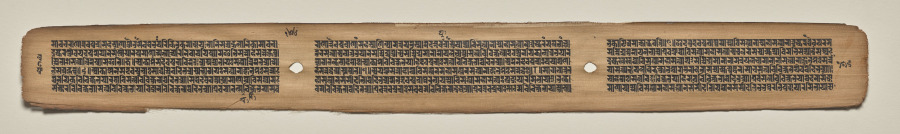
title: Text, folio 156 (verso), from a Manuscript of the Perfection of Wisdom in Eight Thousand Lines (Ashtasahasrika Prajnaparamita-sutra)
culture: Eastern India, Bihar, Vikramashila Monastery. Painting: Nepal, Kathmandu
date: Sunday, September 14, 1119 (year 239 of the Newar Samvat in the month of Ashvina)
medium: gum tempera and ink on palm leaves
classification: Painting